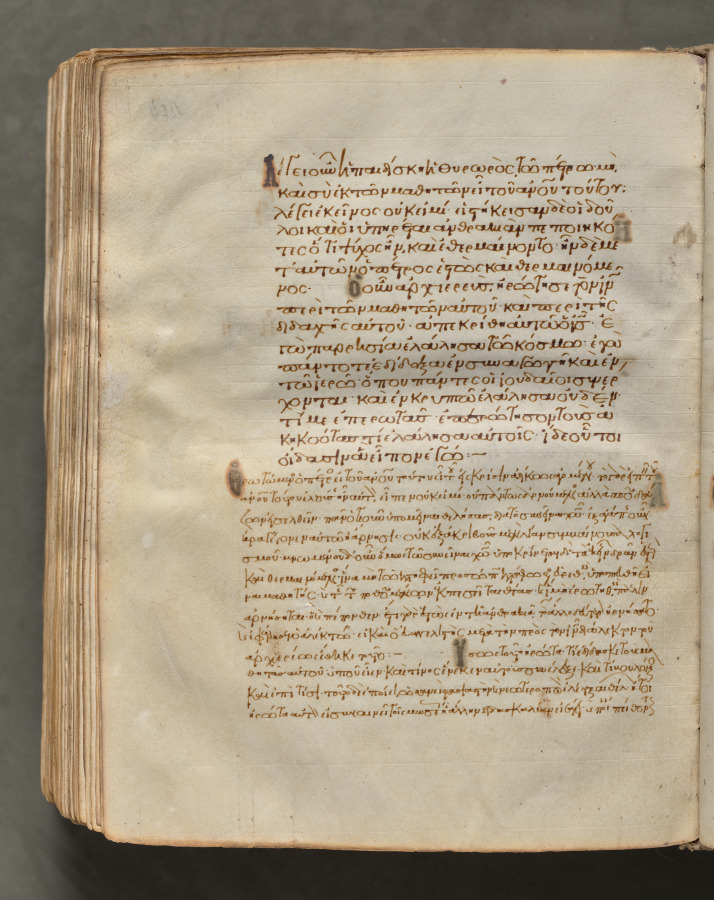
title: Text, folio 408 (verso), from a Gospel Book with Commentaries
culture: Byzantium, Constantinople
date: c. 1000–1100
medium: ink, tempera, and gold on vellum; leather binding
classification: Bound Volume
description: Each of the four gospels in this book opens on a page with brilliantly illuminated borders depicting the author of the text as well as birds—principally peacocks, symbols of the immortality of the soul—and fountains, representing the fountain of life and the salvation of the soul. This volume consists of 428 leaves with texts in Greek. Its level of sophistication suggests that it was probably written and decorated in a monastery in Constantinople.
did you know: Gospel books were carried in procession through Byzantine churches.